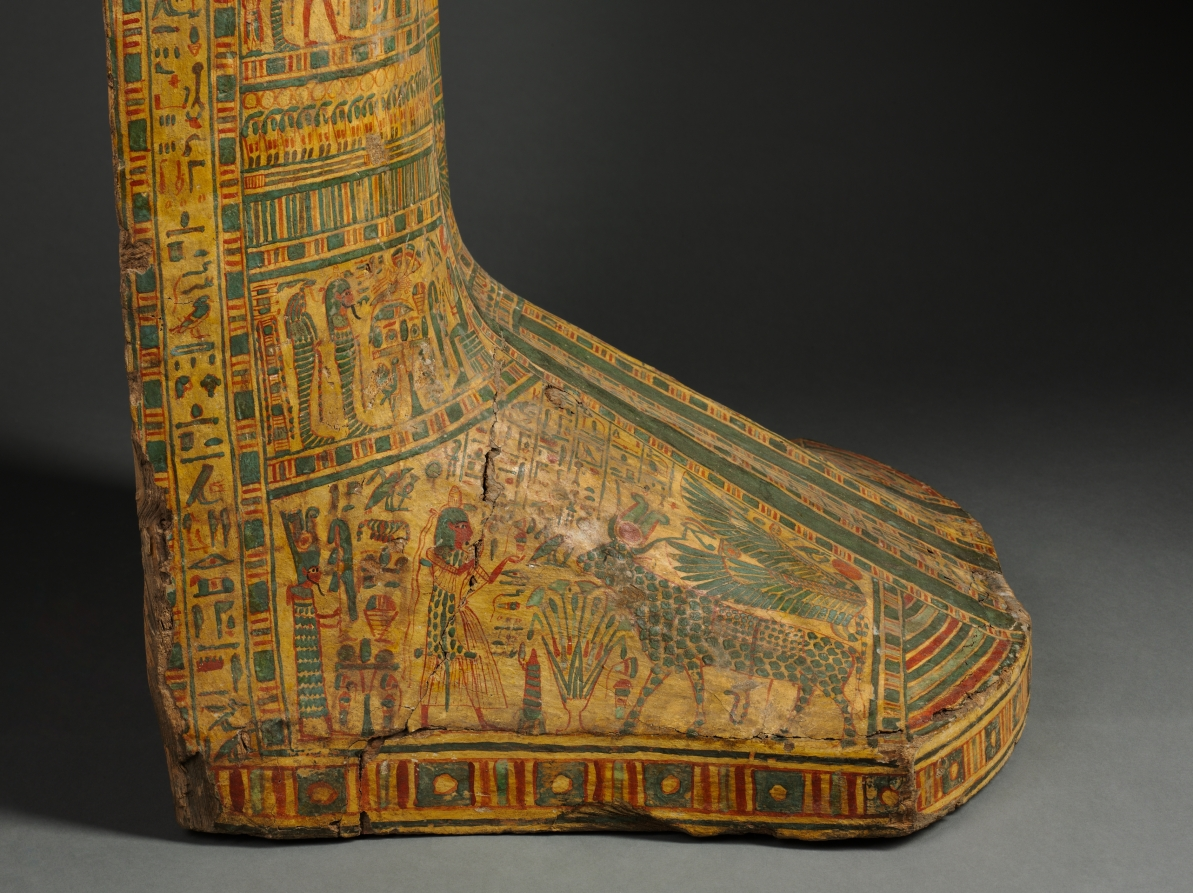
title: Coffin of Bakenmut (lid)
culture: Egypt, Thebes, Third Intermediate (1069–715 BCE), Dynasties 21–22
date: c. 1000–900 BCE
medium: gessoed and painted sycamore fig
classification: Funerary Equipment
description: The coffin of Bakenmut is one of the finest examples of painted wooden coffins made for the priests of Amen and their families at Thebes during Dynasty 21 and early Dynasty 22. The pharaohs of this time were no longer buried in the Valley of the Kings, but instead built tombs in the Delta, far to the north, where they resided. Security was lax in the Theban necropolis. The coffins and funerary goods of the wealthy citizens of Thebes were placed in unmarked and undecorated family tombs cut into the cliffs on the west bank of the Nile. All the care and detail that in more prosperous times were devoted to the decoration of the tomb chapel were now lavished on the elaborately painted coffins. Every available surface is crowded with religious scenes, images of funerary gods and goddesses, protective spells, and magical symbols. The deceased appears mummiform. An elaborate floral collar entirely covers the upper body, exposing only the separately attached hands (now lost). A pair of red "mummy braces" are crossed over the chest, their point of intersection marked by a winged sun disk. The lower body is covered with tiny figures modeled in gesso against a yellow background, which gives the effect of gold inlaid with glass or semiprecious stone. The decoration on the interior features two deified dead kings of Dynasty 18. Although these rulers had lived centuries before, memory of their greatness was still very much alive. The main scene near the top depicts Tuthmosis III, the great military pharaoh, who lived 500 years before Bakenmut. Posed as a mummy, the ruler wears a brilliant feathered garment enfolding him with falcon’s wings. The scene below features back-to-back seated images of Amenhotep I, regarded as the patron of the Theban cemetery and worshiped as a local god there.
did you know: Originally another smaller coffin was placed inside this outer coffin and in that the deceased with a mummy board would have rested.